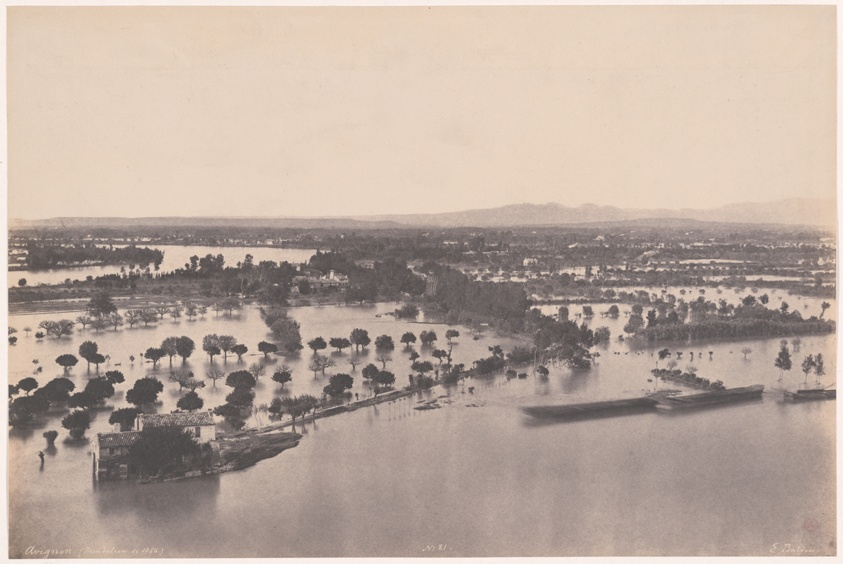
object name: Photograph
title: Avignon (Flood of 1856) (Avignon [Inondation de 1856])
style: 19th century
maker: Édouard Baldus; French, born Germany, 1813–1889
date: 1856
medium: Salted paper print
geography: France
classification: photograph; photography